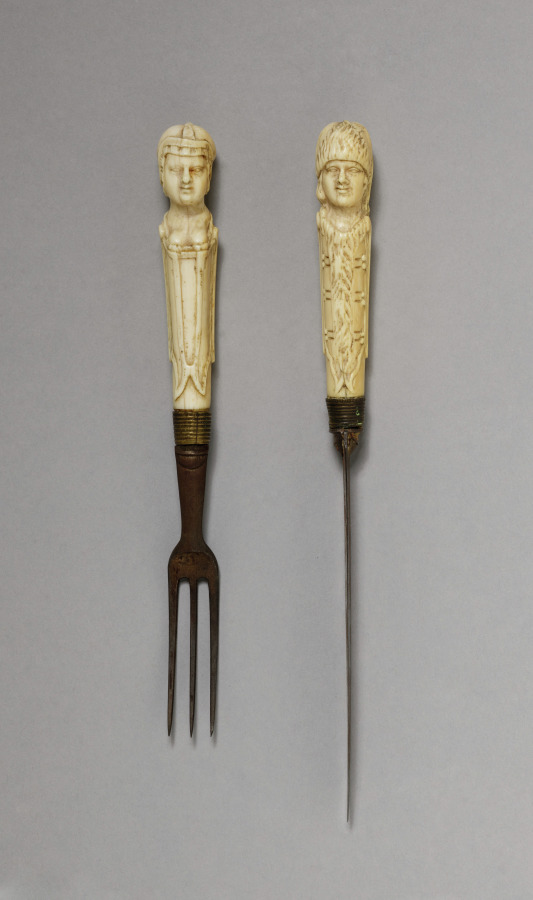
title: Knife and Fork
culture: Italy, 18th century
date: 1700s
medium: metal blade, ivory handle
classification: Ivory